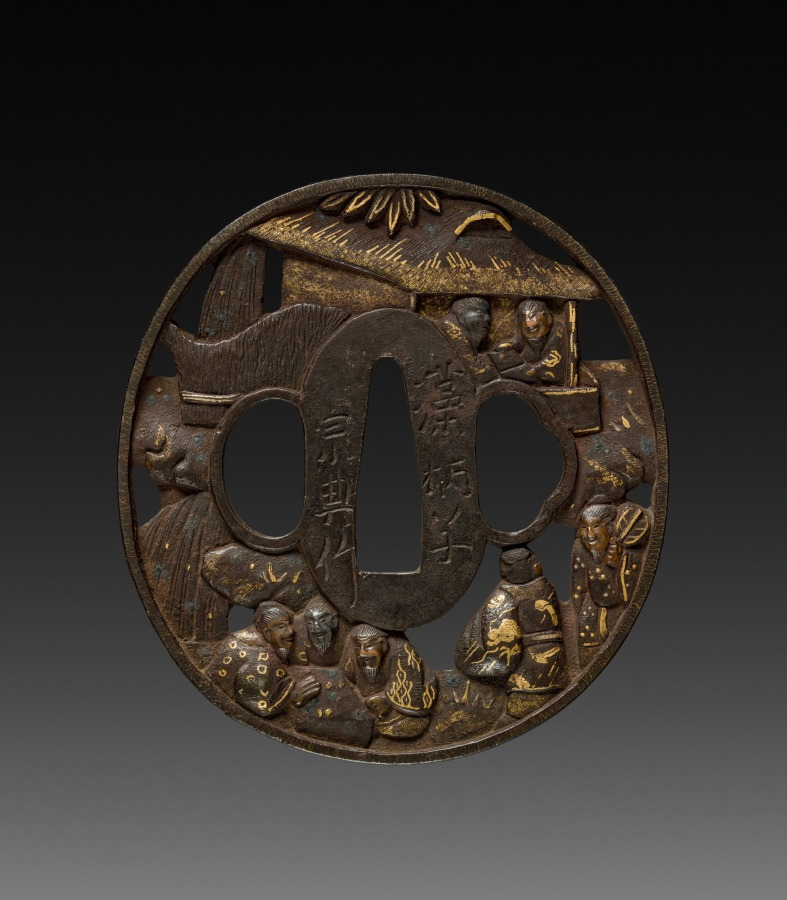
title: Sword Guard (Tsuba)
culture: Japan, Edo period (1615–1868)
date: 1800s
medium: bronze or steel; gilt details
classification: Metalwork